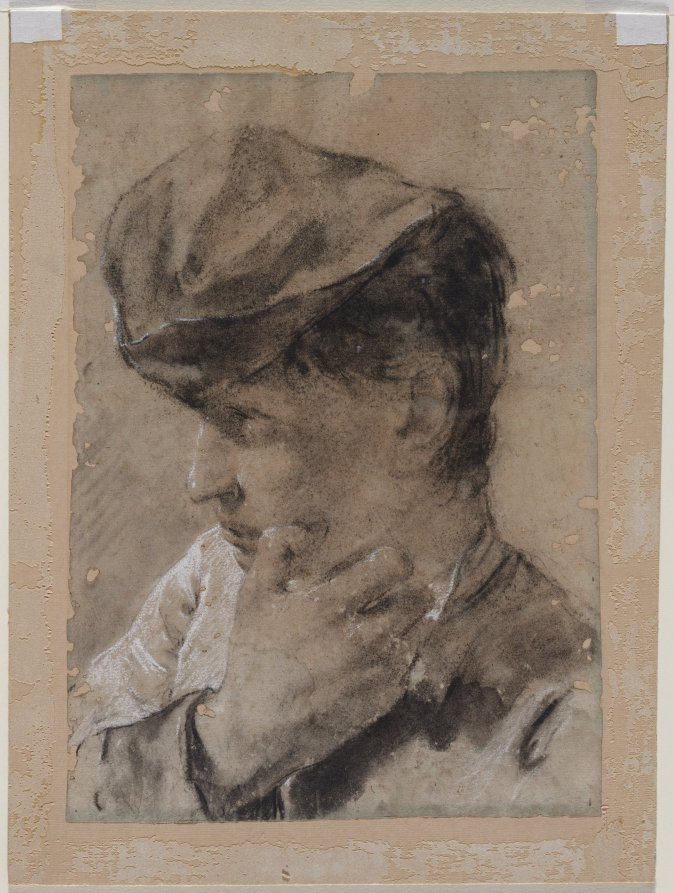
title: Head of a Young Man in a Cap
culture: Italy, 18th century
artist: Giovanni Battista Piazzetta (Italian, 1682–1754)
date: first half 18th century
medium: black chalk heightened with white chalk, with stumping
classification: Drawing